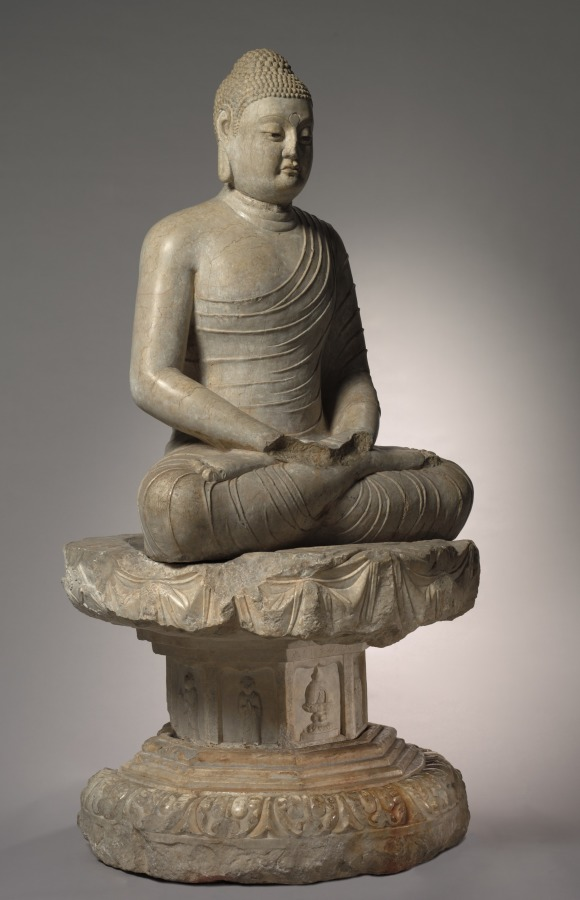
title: Fang Xuanling Pedestal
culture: China, Tang dynasty (618-907)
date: 647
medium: marble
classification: Sculpture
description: This double lotus pedestal exhibits the rich, ornate style of early Tang sculpture. It was commissioned by the Duke of Liang, Fang Xuanling (578–648), for the blessing of his second son and daughter-in-law, the Tang imperial princess of Gaoyang. The iconography and inscription suggest that it originally went with a statue, now missing, of Shakyamuni, the historical Buddha, instead of Amitayus. Today the pedestal is topped with Amitayus, the Buddha of Infinite Life, seated in meditation. Although the pedestal was not made with the statue, the combination is faithful to the original artistic conception.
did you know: In front, the top layer of the pedestal has an abstract curvilinear motif suggesting drapery; the rear is carved with a flower-and-leaf motif.